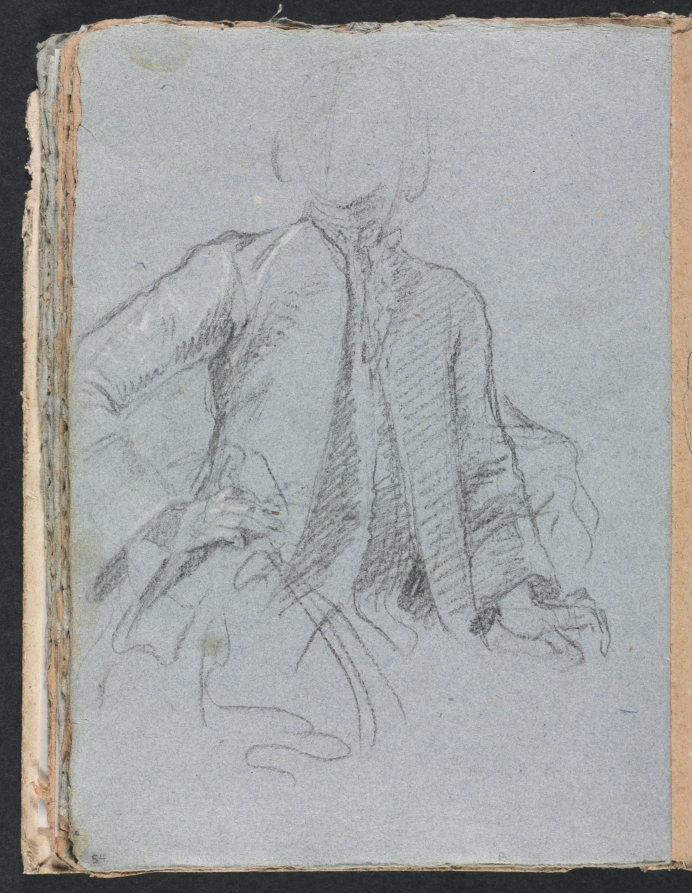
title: Verona Sketchbook: Gentleman (page 54)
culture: Italy, 18th century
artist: Francesco Lorenzi (Italian, 1723–1787)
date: 1760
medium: black chalk with white heightening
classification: Bound Volume